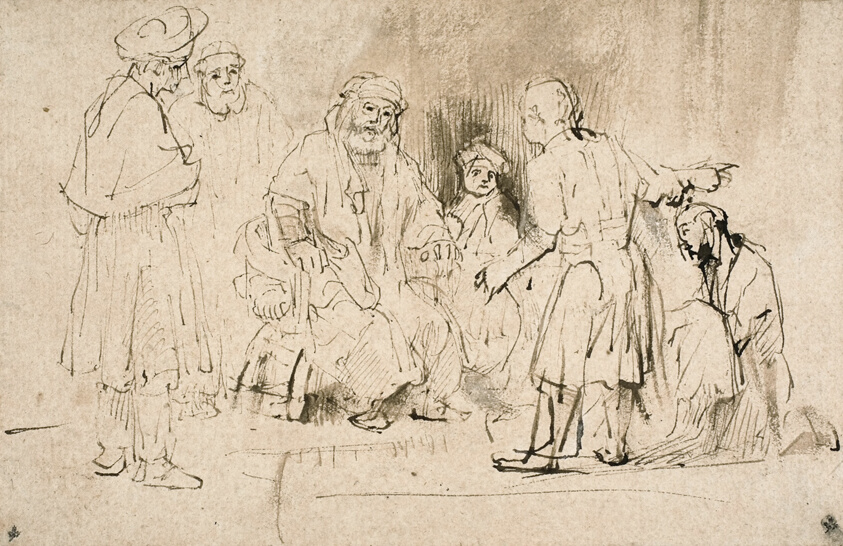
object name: Drawing and Watercolor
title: Jacob Shown Joseph’s Blood-Stained Coat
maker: Aert de Gelder (Dutch, 1645-1727)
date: c. 1660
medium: Pen and brown ink, with brush and brown wash, with touches of white opaque watercolor, on buff laid paper, laid down on ivory laid paper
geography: Netherlands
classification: pen and ink drawings; drawings (visual works); prints and drawing